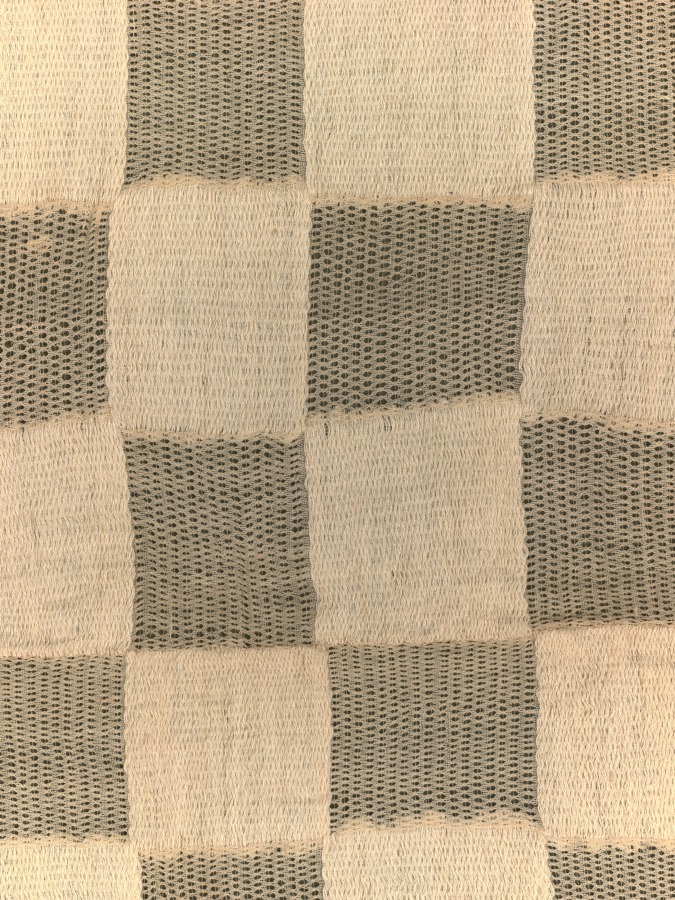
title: Loincloth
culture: Peru, North Coast, Chimú style, 1200–1460s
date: 1425–1500 (radiocarbon date, 92.3% probability)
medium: cotton; plain weave, brocaded and complex alternating gauze with 5 shots of plain weave between gauze shots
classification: Garment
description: Loincloths were basic men’s wear in ancient Peru. But the extraordinary size of some examples—this one is about eight feet long, unfolded—makes it difficult to know how they were worn, except that they were tied around the waist with the decorated panels hanging at the front and back of the body. The appearance may have been that of a billowing skirt.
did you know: This loincloth is huge!